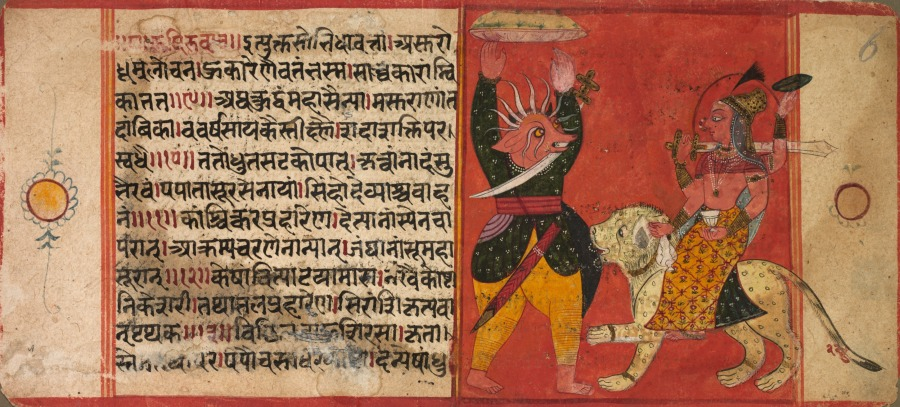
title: Devi Attacking a Demon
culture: India, Rajasthan, Possibly Sirohi, 17th century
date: c. 1630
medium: Gum tempera, ink, and gold on paper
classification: Painting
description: The horizontal format of this sacred text is derived from the earlier use of palm leaves instead of paper. This page is from the foundational work of scripture for worshippers of the great goddess Devi. In her warrior aspect, or incarnation, Devi is multiarmed, rides a lion, and conquers demons more powerful than all the male gods. The demon holding a mountain above his head as a missile is dressed in the Central Asian belted tunic and pants of the Mughals, who ruled most of India at the time this painting was made. Devi wears the Mughal women’s style of tall flat-topped feathered headdress, and she holds a bottle and cup of liquor. Aside from these Mughal elements, the style remains staunchly indigenous, with unmodeled figures in strict profile against a flat red ground.